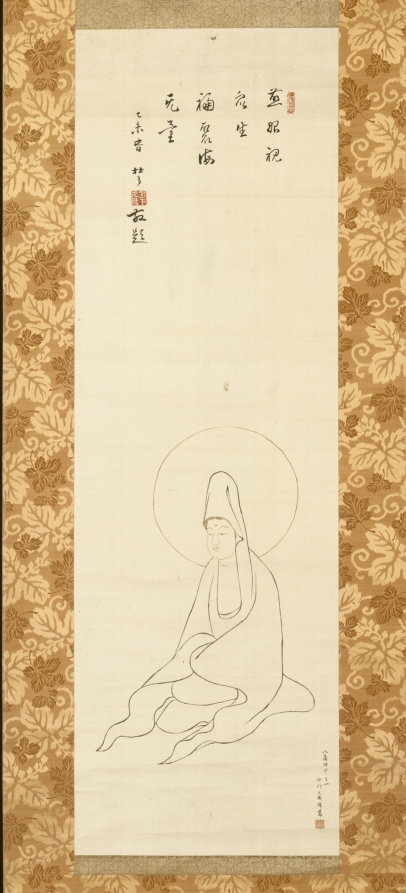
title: White-Robed Guanyin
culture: China, Yuan dynasty (1271-1368)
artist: copy after Jueji Yongzhong (Chinese, active around 1300)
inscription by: Zhongfeng Mingben (Chinese, 1263–1323)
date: late 1200s–early 1300s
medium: hanging scroll; ink and gold on silk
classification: Painting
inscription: Inscription: one of the 84,000 painted by the priest Insei.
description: The original model for this ink drawing of Guanyin, the bodhisattva of infinite compassion (Avalokiteshvara in Sanskrit), is CMA 1978.47.1. This drawing is a later copy with the same image of the White-Robed Guanyin, but in reverse. The inscription above reads: one of the 84,000 painted by the priest Insei. The inscription seems to indicate that the Japanese priest Insei repeatedly copied the image of the bodhisattva in an act of piety and to accumulate merit, as is promised in the Lotus Sutra for anyone who paints images of the Buddha, they “will achieve the Buddha path.” The priest’s name and seal need further study and identification.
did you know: The bodhisattva's face and halo were delicately painted in gold.